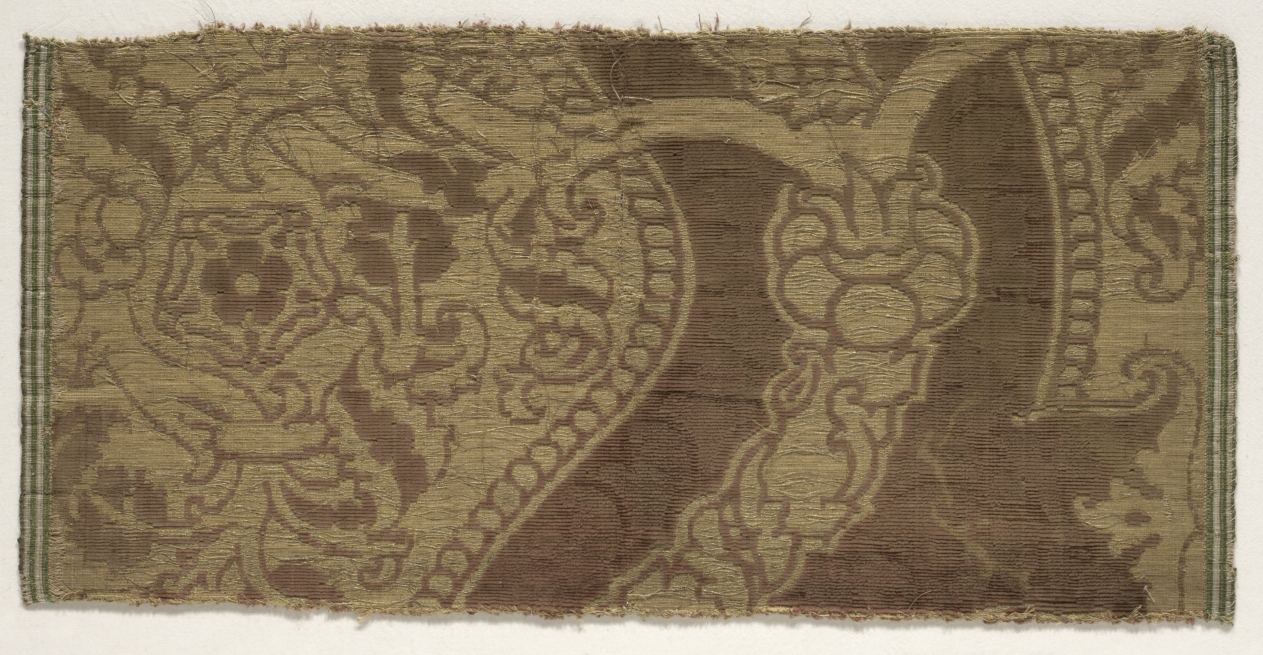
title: Velvet Textile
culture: Spain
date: 1500s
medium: velvet; silk and metallic thread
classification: Velvet